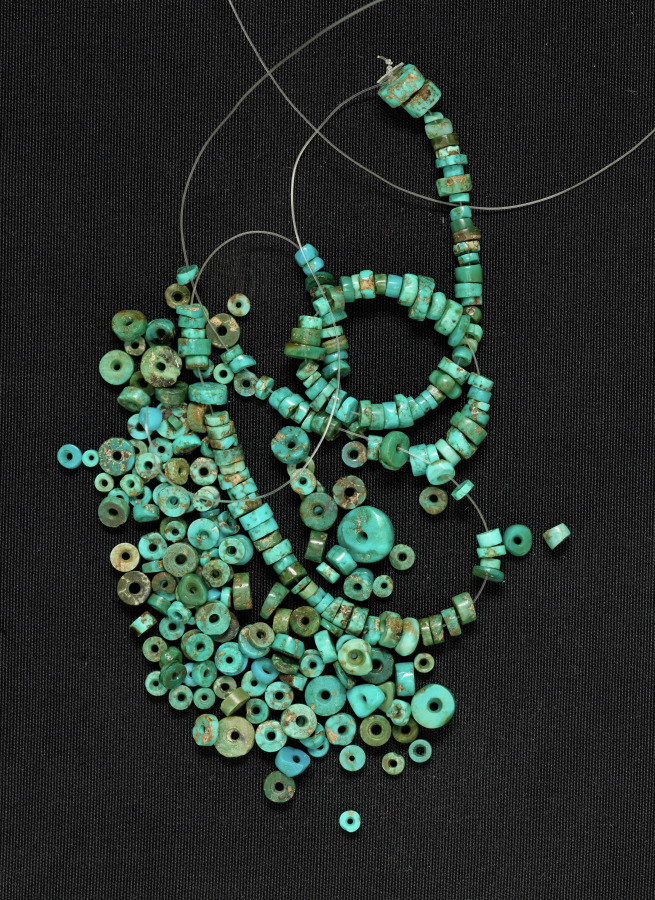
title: Modern blue beads removed from Necklace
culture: Colombia, Muisca style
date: 20th century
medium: stone?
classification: Jewelry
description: Muisca metalwork divides into two categories: ornaments to be worn, such as these, and offering figurines, in the case to the right. The elaborate bird pendant features delicate herringbone moldings, openwork patterns, and wing details-all part of the wax model from which the pendant was cast (see nearby computer animation). The dangles were attached after casting.